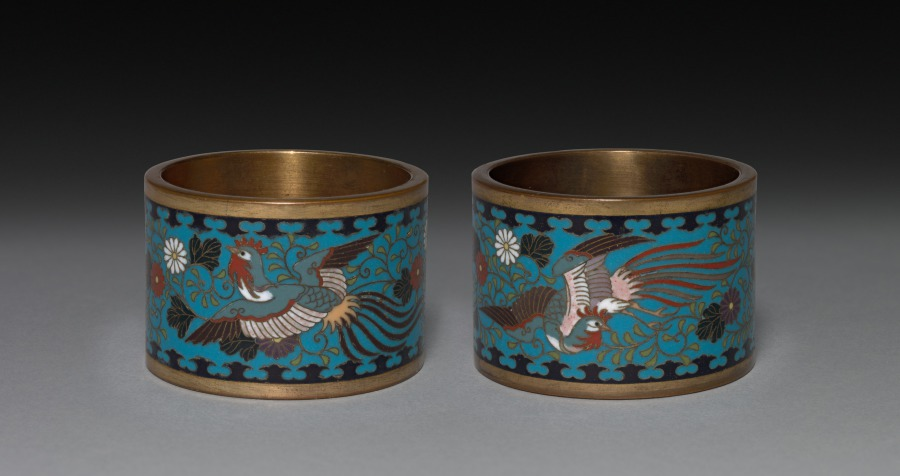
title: Napkin Rings with Bird and Flower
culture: Japan, Meiji period (1868–1912) or Taishō period (1912–26)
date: early 1900s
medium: Pair; cloisonne enamel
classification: Enamel